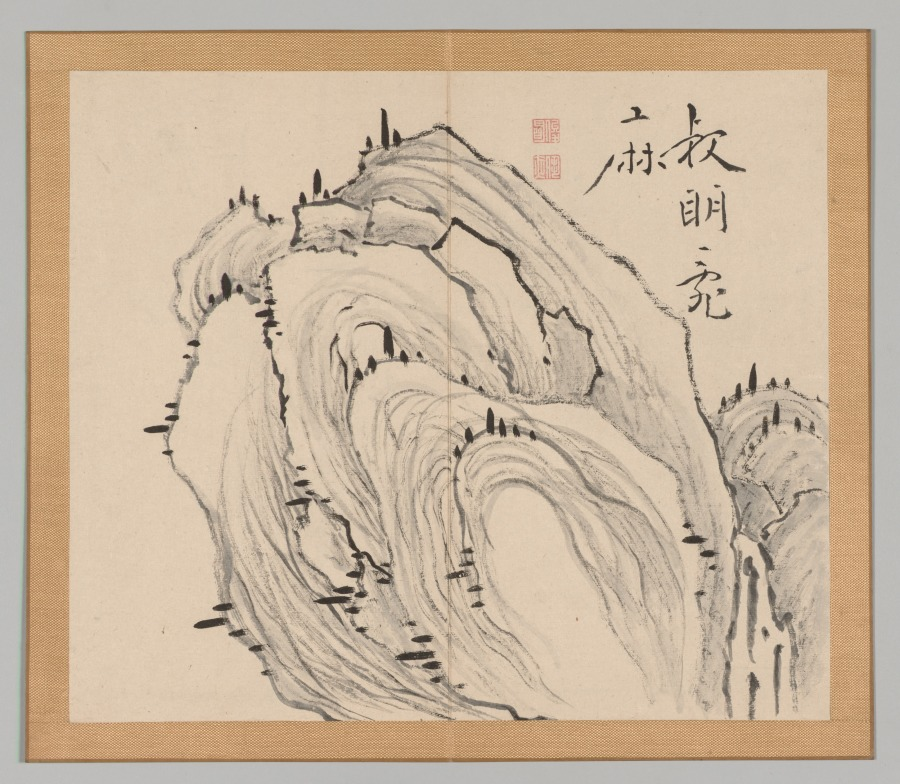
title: Reverberations of Taiga, Volume 1 (leaf 11)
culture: Japan, Edo period (1615–1868)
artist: Aoki Shukuya (Japanese, d. 1802)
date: mid- to late 1700s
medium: double-leaf from a pair of albums; ink and light color on paper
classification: Portfolio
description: Traditionally, young painters in Japan began their studies with an established master-painter. The master's compositions invariably became models that the apprentice copied to learn various ink and brush techniques. Shukuya was a pupil of the famous Kyoto artist Ikeno Taiga, whose style is reflected in these sketches of rocks, trees, and mountains.